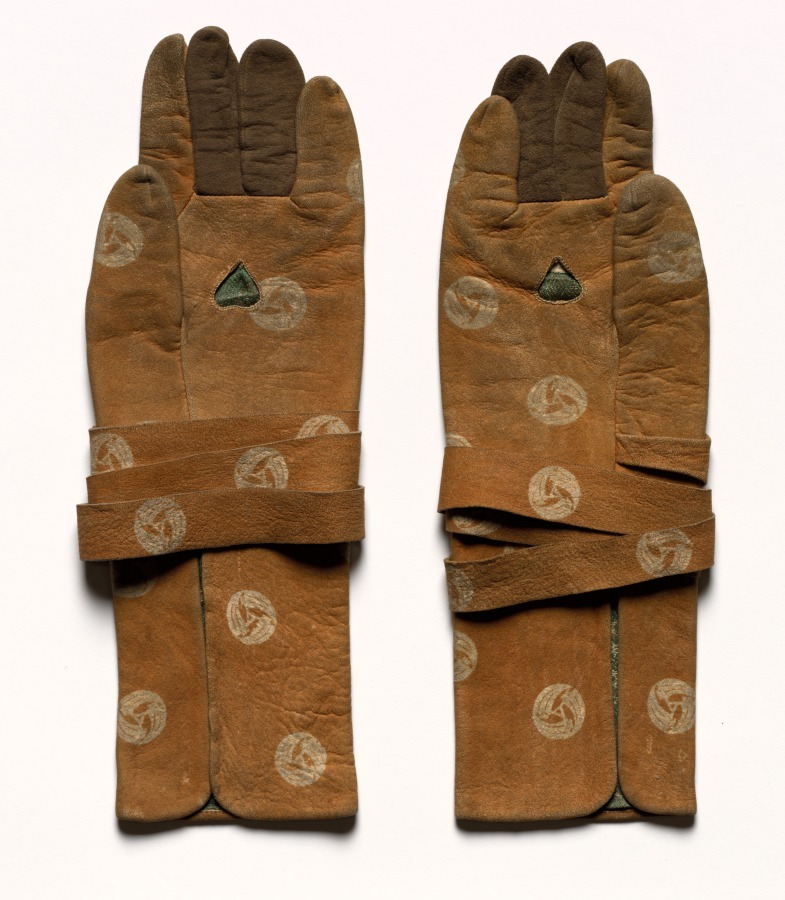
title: Pair of Archer's Gloves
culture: Japan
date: 1800s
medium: chamois leather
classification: Garment